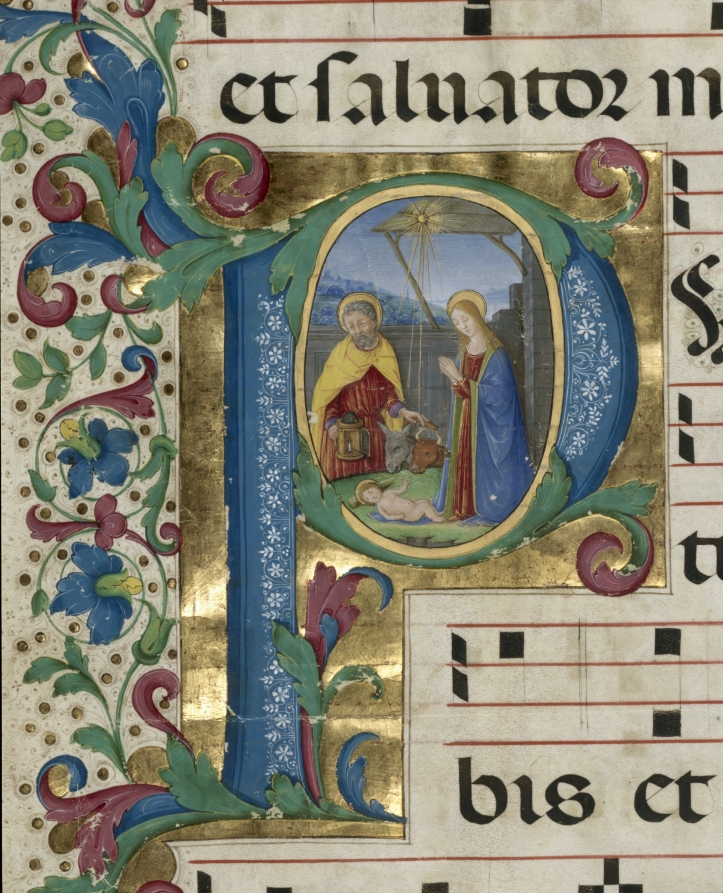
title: Leaf from a Gradual: Initial P with the Nativity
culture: Italy, Florence, late 15th, early 16th century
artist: Attavante degli Attavanti (Italian, c. 1452-c. 1525)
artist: Workshop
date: c. 1500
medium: ink, tempera and gold on vellum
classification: Manuscript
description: This beautiful initial P introduces the text Puer natus e[st] nobis, et filius datus est nobis (“For a child is born to us, and a son is given to us”) which marks the opening of the Introit for Christmas Day. The text, taken from Isaiah 9:6, continues, “. . . and his name shall be called Wonderful.” It is used to celebrate one of the most joyous events of the Christian Church—the birth of Christ. This splendid leaf from a manuscript gradual contains the chants used for solemn high Mass on Christmas Day. The initial P features sprays of foliage that emerge and migrate along three sides of the page. Painted by Attavante degli Attavanti, one of the most prominent Florentine illuminators of the late 15th century—whose patrons included Duke Federigo da Montefeltro of Urbino, King Matthias Corvinus of Hungary, and the Medici Pope Leo X—the initial is characteristic of Attavante’s use of a bright, sunny palette. His miniatures often include detailed landscapes with receding vistas and sundrenched hills, townscapes, and ultramarine skies.